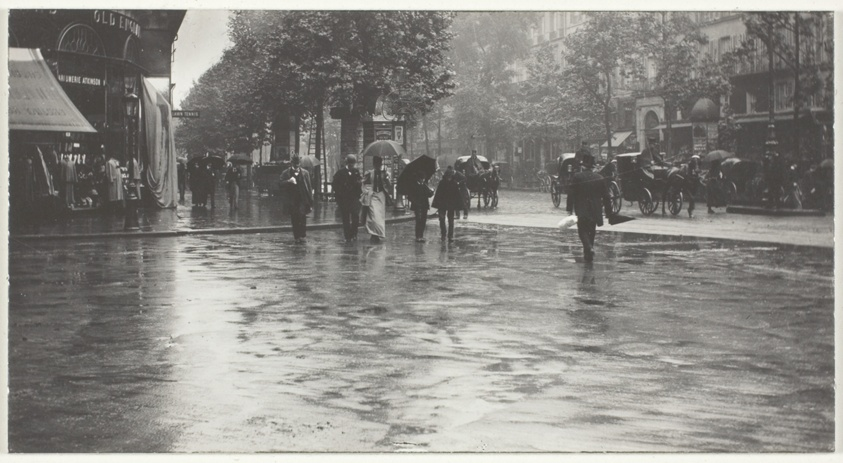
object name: Photograph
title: A Wet Day on the Boulevard, Paris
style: Pictorialism, 19th century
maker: Alfred Stieglitz (American, 1864–1946)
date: 1894, printed 1918/32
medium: Gelatin silver print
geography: United States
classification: gelatin silver (developing-out-paper) pr; photographic process; photography; photograph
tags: Paris, cityscapes